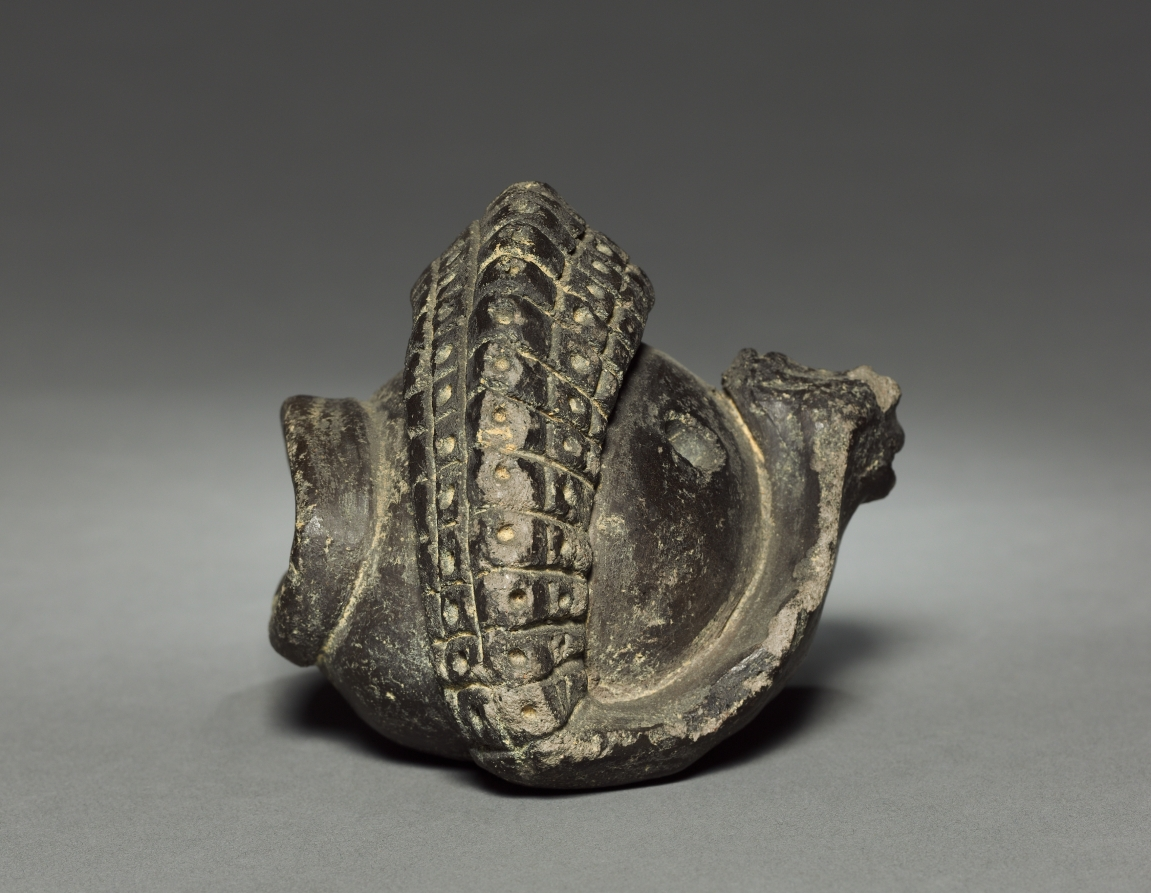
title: Coiled Snake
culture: Colombia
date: before 1921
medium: pottery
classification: Ceramic